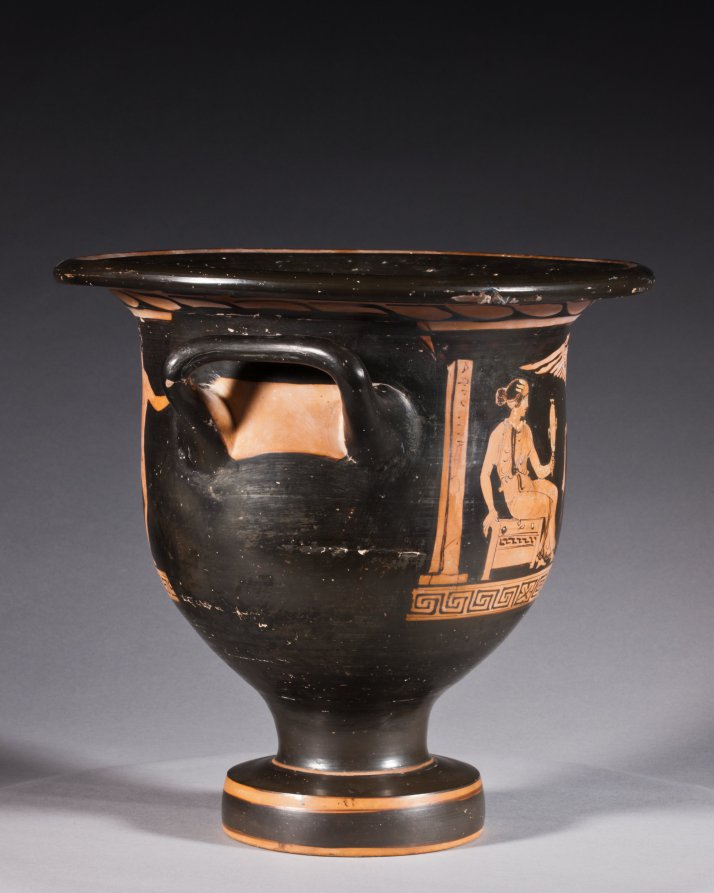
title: Red-Figure Bell Krater (Mixing Vessel): Aphrodite and Eros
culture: South Italian, Apulian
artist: attributed to Graz Painter (South Italian, Apulian, active c. 380–360 BCE)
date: c. 370–360 BCE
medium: ceramic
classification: Ceramic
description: This small mixing vessel shows a finely dressed woman seated on a chest and holding up a mirror to admire herself. Before her stands Eros, the winged god of love, holding a ribbon or sash. Behind the woman stands a pillar with the inscription ΑΦΡΟΔΙΤΗ, or APHRODITE, the goddess of love. Such labels are rare on vases, and scholars debate whether this names the woman shown as Aphrodite herself, with her son Eros, or a bride envisioning herself as Aphrodite, just before her wedding.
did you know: The dancing nude youths on the reverse are unusual; typically they would be standing and draped.